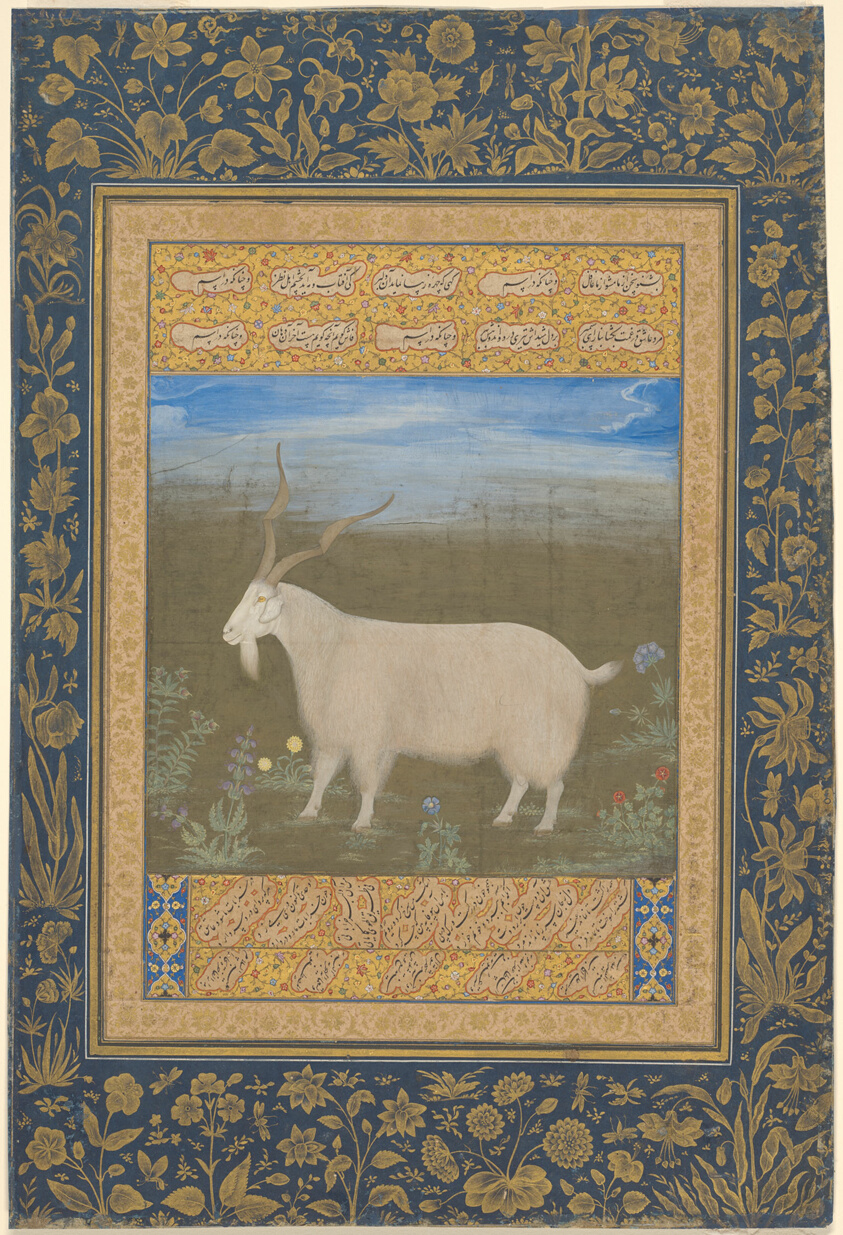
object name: Painting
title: Portrait of a Ladakhi Mountain Goat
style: mughal, jahangir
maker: India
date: Mughal dynasty (1526-1857), c. 1600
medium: Opaque watercolor, ink, and gold on paper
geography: India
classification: painting; asian art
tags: animals